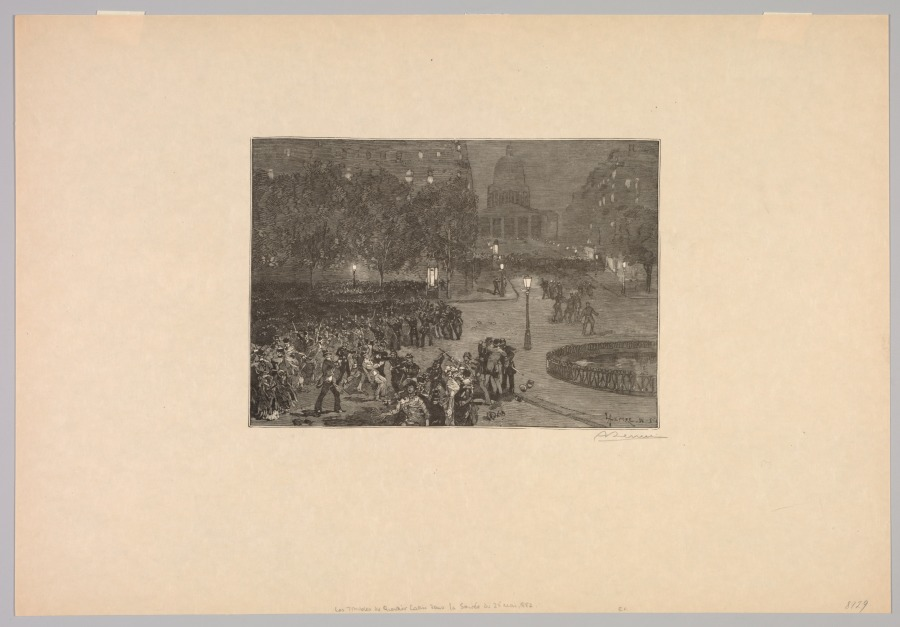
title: Bois du Monde: Les troubles du quartier Latin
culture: France, 19th century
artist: Auguste Louis Lepère (French, 1849–1918)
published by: published in Le Monde Illustree, June 10, 1882, and later issued as signed print in the delux portfolio Bois du Monde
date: 1882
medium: wood engraving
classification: Print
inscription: below image, in graphite, right: A Lepere; lower center margin, in graphite: Les troubles du quartier Latin dans la soirée de 25 Mai, 1882 EA; lower right corner, in graphite: 8929; in plate, lower right: ALepere - Dd - SC Dealer's typed label on mat: 8929 $350